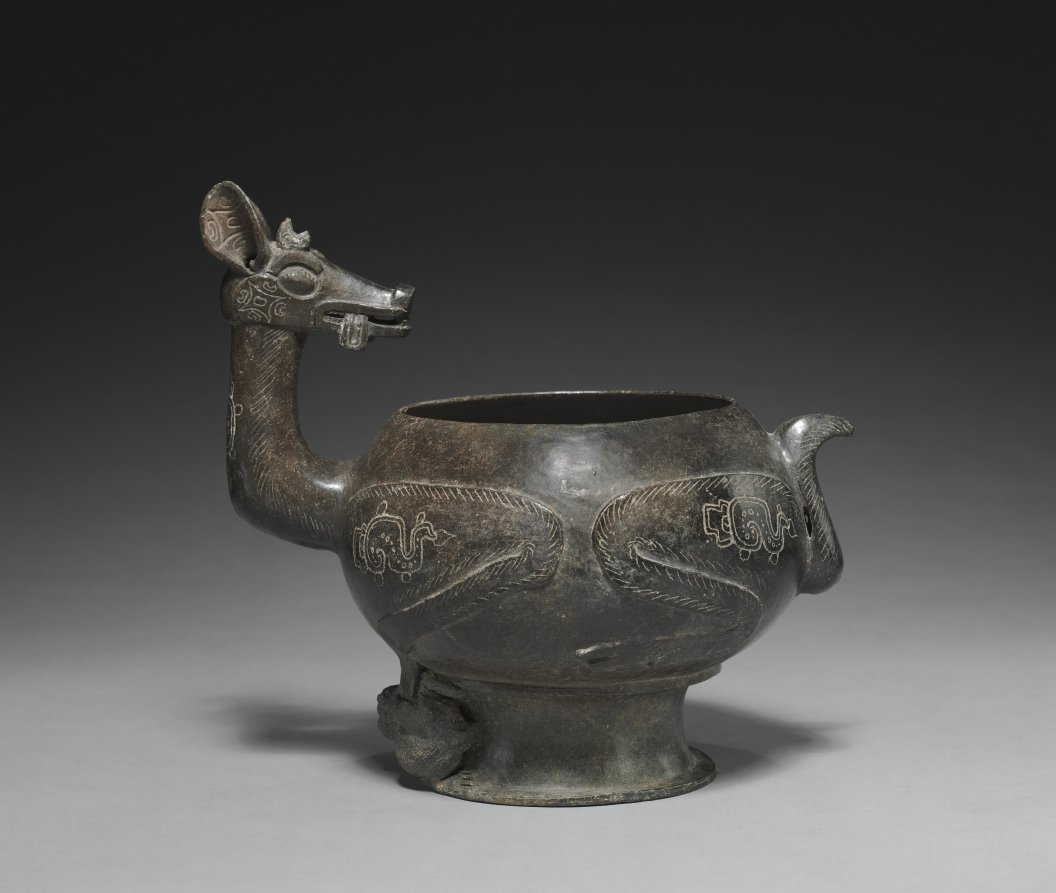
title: Deer Effigy Vessel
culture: Mesoamerica, Maya style, Classic Period (250-900)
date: 250–600 CE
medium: earthenware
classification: Ceramic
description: Maya artwork from the Early Classic Period (about AD 250-600) is dominated by three-dimensional sculpture in jade, stone, wood, and especially ceramic. This vessel is an exceptionally elegant example of Maya blackware, produced by firing earthenware pottery in a reducing (low oxygen) atmosphere. The deer is frequently depicted in Maya art, usually as a victim of either hunting or sacrifice. Venus signs and conch shells engraved on the deer also suggest death, for the planet Venus was regarded as a bringer of ill-fortune, and conch shell trumpets were carried by hunters. The small frog or toad pressed firmly under the deer's hoof relates to agricultural fertility. The croaking of these amphibians was a harbinger of rain.